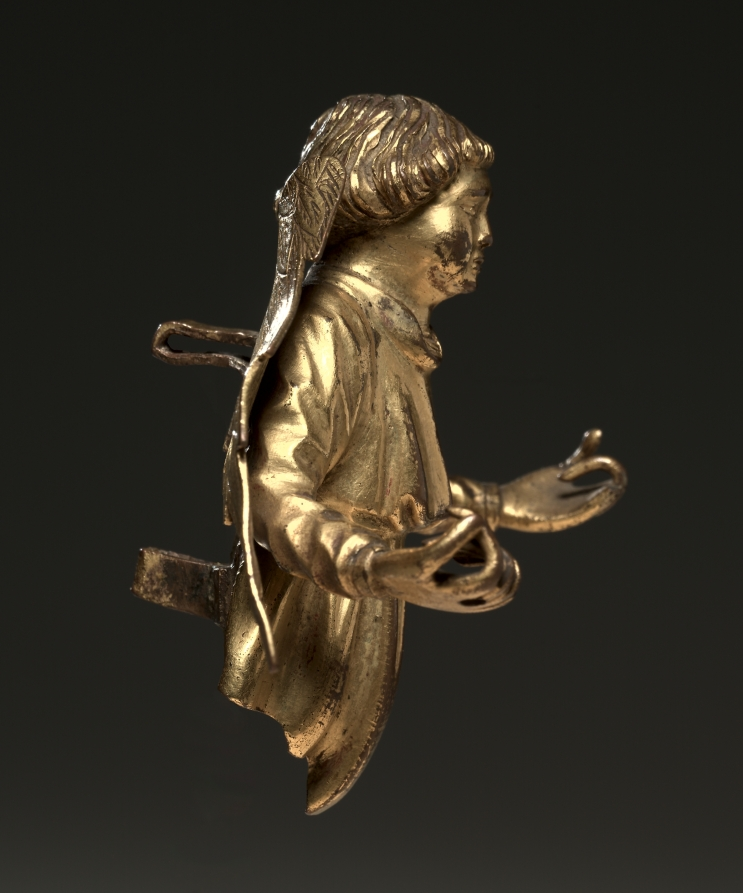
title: Angel from an Architectural Reliquary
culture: Franco-Netherlands or Paris, 15th century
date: c. 1400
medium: gilt bronze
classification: Sculpture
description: This beautiful Gothic angel is probably a surviving element from a large architectural reliquary. The last clue to its lost context disappeared when the symbolic attribute was twisted from the angel’s fingers, possibly during the destructive zeal of the French Revolution. The technique and style are characteristic of the lay workshops employed by the Valois courts during the early 1400s.